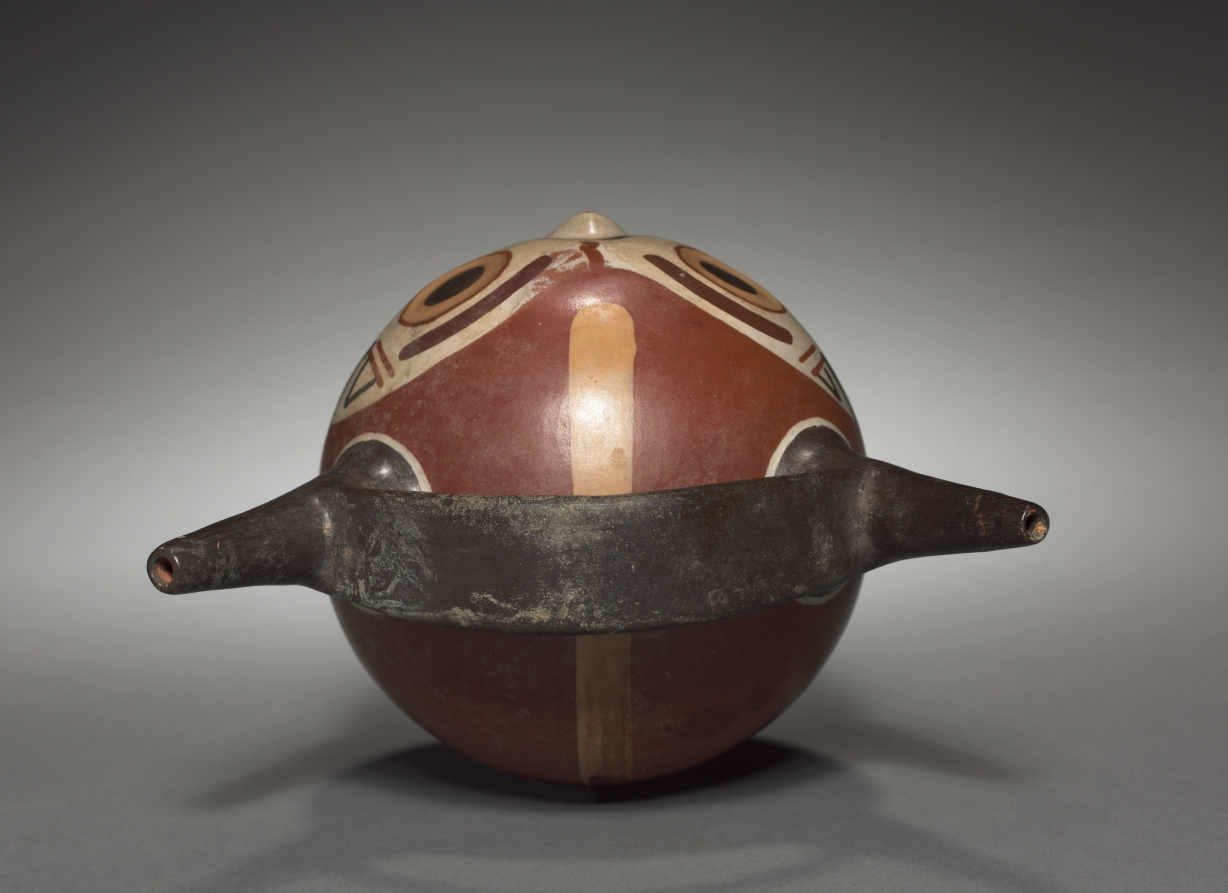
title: Skull Vessel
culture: Wari (Pachacamac) style, Middle Horizon, Epoch 2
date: 500–900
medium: earthenware with colored slips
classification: Ceramic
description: This vessel's clear, vibrant color reveals the inspiration of Wari ceramics in those of the South Coast Nasca. The twin spouts joined by a flat, handle-like bridge are also an old South Coast spout type.